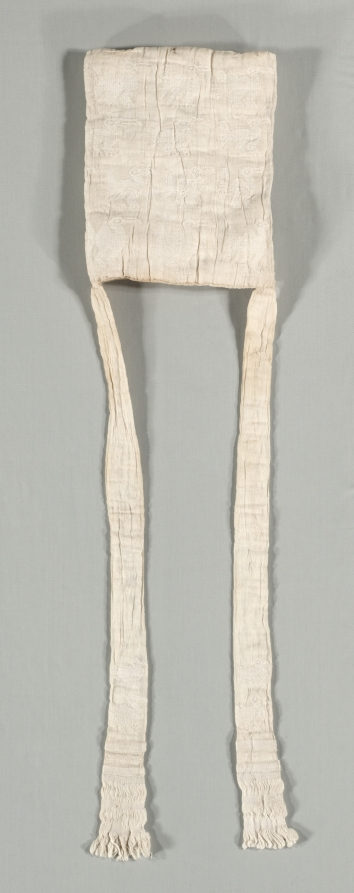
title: Padded Hat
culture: Peru, North Coast, Chimú style, 1200-1460s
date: 1460–1625 (radiocarbon date, 95.4% probability)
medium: cotton; plain weave, brocaded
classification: Garment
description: This garment may have been found with others in the collection that formed a matched set worn by a noble of the Chimú, who rose to power on Peru’s north coast after 1000 AD.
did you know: The Chimú forged an empire that thrived until the 1460s, when the Inka incorporated it into their own imperial domain.